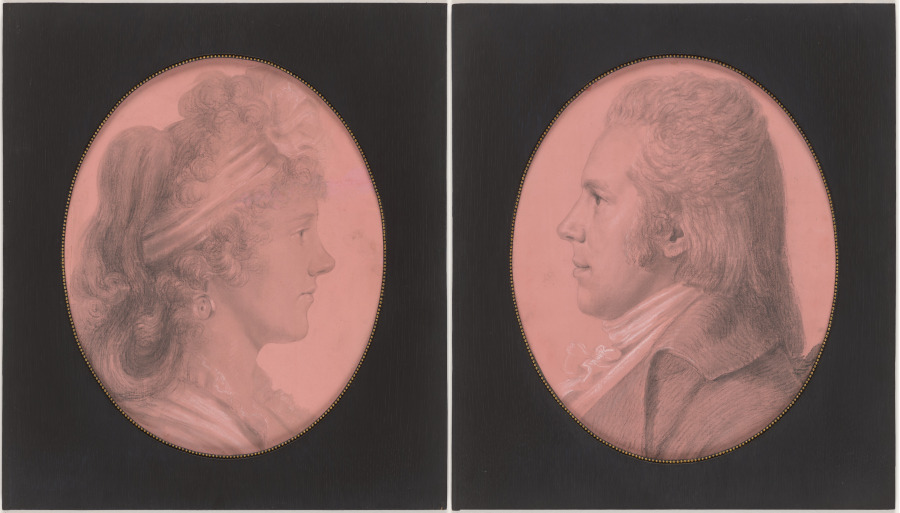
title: Portrait of Georges Arnold Fitzwilliam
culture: France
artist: Charles Balthazar Julien Fevret de Saint-Mémin (French, 1770–1852)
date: c. 1790–1852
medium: Black and white chalk on buff paper with pink wash in original frame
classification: Drawing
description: This portrait and its pair (2024.35.2), depict George Fitzwilliam, an English merchant, and his American wife Eleanor Ramsay Fitzwilliam, who sat in New York for the French émigré artist Charles Balthazar Julien Févret de Saint-Mémin. Saint-Mémin used a recently invented mechanical device called a physiognotrace to trace accurate profiles of his sitters, which he then completed in black and white chalks. The technology enabled Saint-Mémin to establish a thriving business catering to prominent Americans—including Presidents Washington, Adams, Jefferson, and Madison, Benjamin Franklin, and several Native American chiefs—at a time when he was in exile from the French Revolution. As part of each commission, Saint-Mémin also supplied etchings of the portrait in a reduced size, which could be given as keepsakes to family and friends.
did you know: The physiognotrace device used to create this portrait consisted of a wooden frame within which a sitter posed in profile; the artist then peered through an eyepiece and followed the contour and features of the sitter’s face by maneuvering a graphite pencil attached to the mechanism.